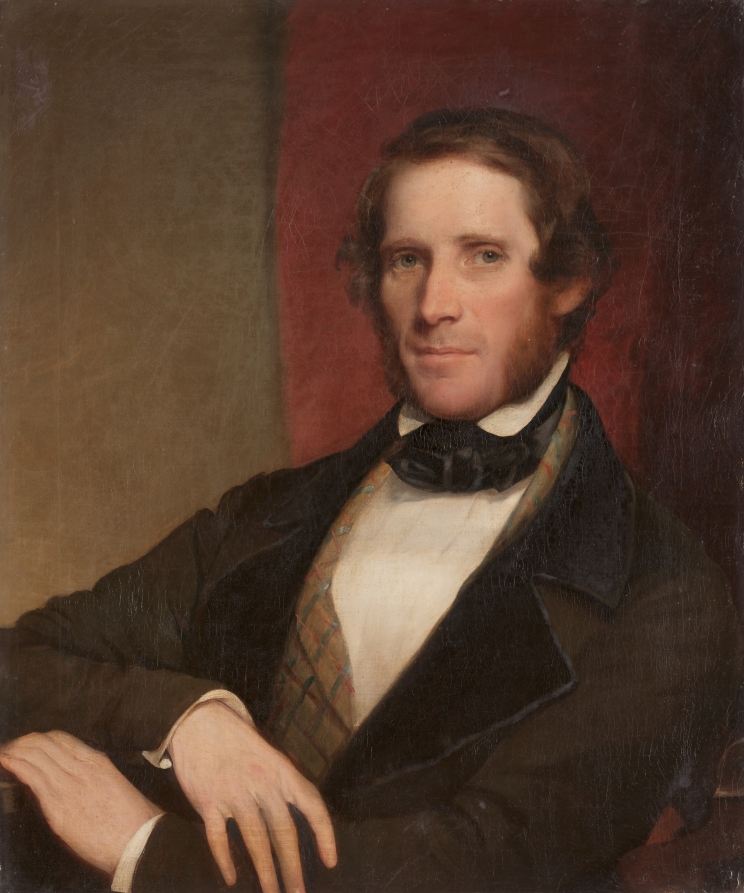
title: John Childe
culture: America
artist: Chester Harding (American, 1792–1866)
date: c. 1835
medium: oil on canvas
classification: Painting